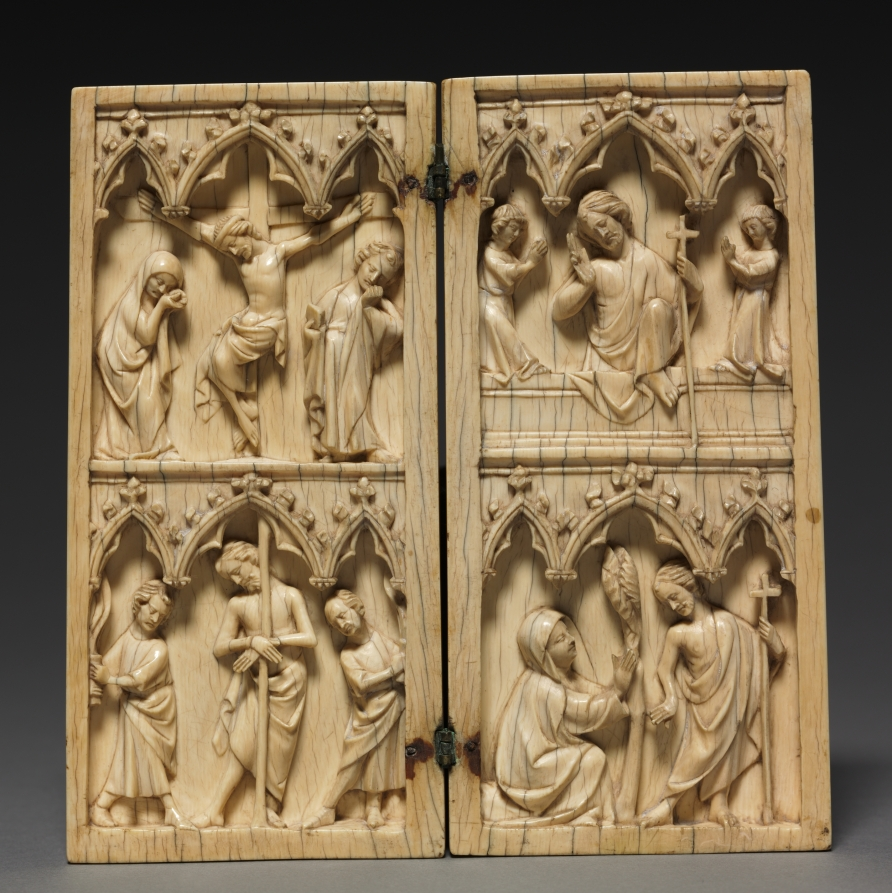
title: Diptych: Scenes from the Passion and Afterlife of Christ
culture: France, Gothic period, 14th century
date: c. 1330–1350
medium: ivory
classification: Ivory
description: The four scenes represented on this ivory diptych are Christ’s Flagellation and Crucifixion on the left panel and Christ’s Resurrection and Appearance to Mary Magdalene (Noli me tangere, or "Do not touch me"). Ivory diptychs like this one illustrating pivotal moments in the story of Christ’s Passion and resurrection served as powerful tools in the devotional practices of elite members of society during the later Middle Ages.